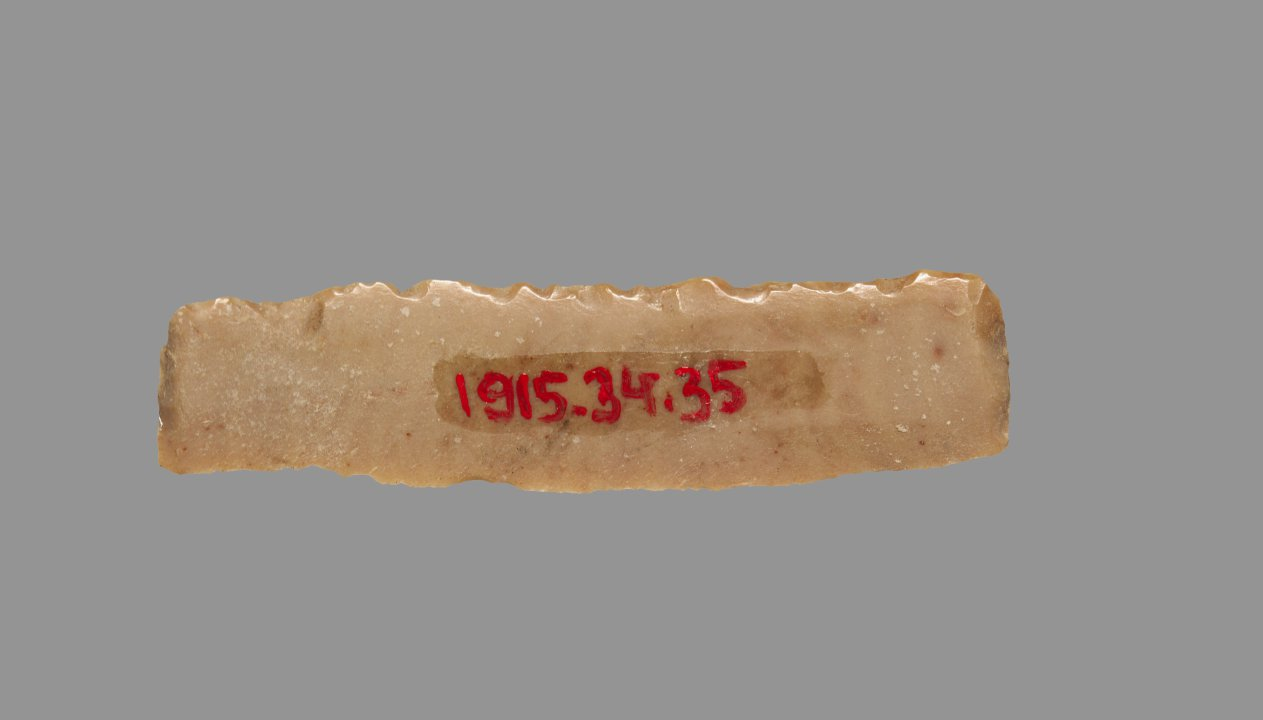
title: Sickle Blade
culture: Egypt, Middle Kingdom (2040–1648 BCE), Dynasty 12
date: 1980–1801 BCE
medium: flint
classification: Implements